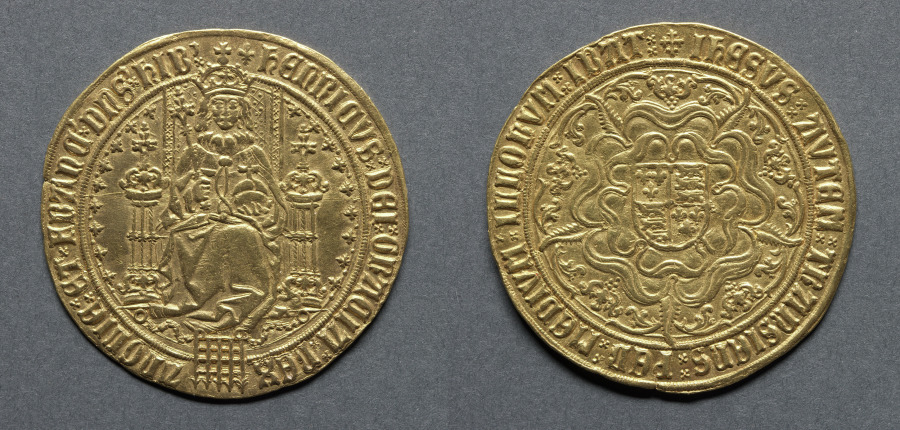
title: Sovereign: Henry VII (obverse); Shield of Arms in Tudor Rose (reverse)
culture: England, Henry VII, 1485-1509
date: 1504–9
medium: gold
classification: Coins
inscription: HENRICIUS DEI GRATIA, REX, ANGLIAE, FRANCIAE, ET HIBRNIA DNS HIB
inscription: IHESUS AVTEM TRANSIENS PER MEDIUM ILLORVM IBAT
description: The coinage of Henry VII is the first step from medieval to modern coinage. In 1489 a special commission was issued for the striking of a new gold coin called the sovereign, weighing 240 gs. This is the first use of the name in the English series. These early sovereigns can boast of an artistic achievement never before realized on an English coin, and perhaps never since.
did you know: Sovereigns are large, thin gold coins that feature portraits of the respective monarch; here Henry VII is sitting on a throne.